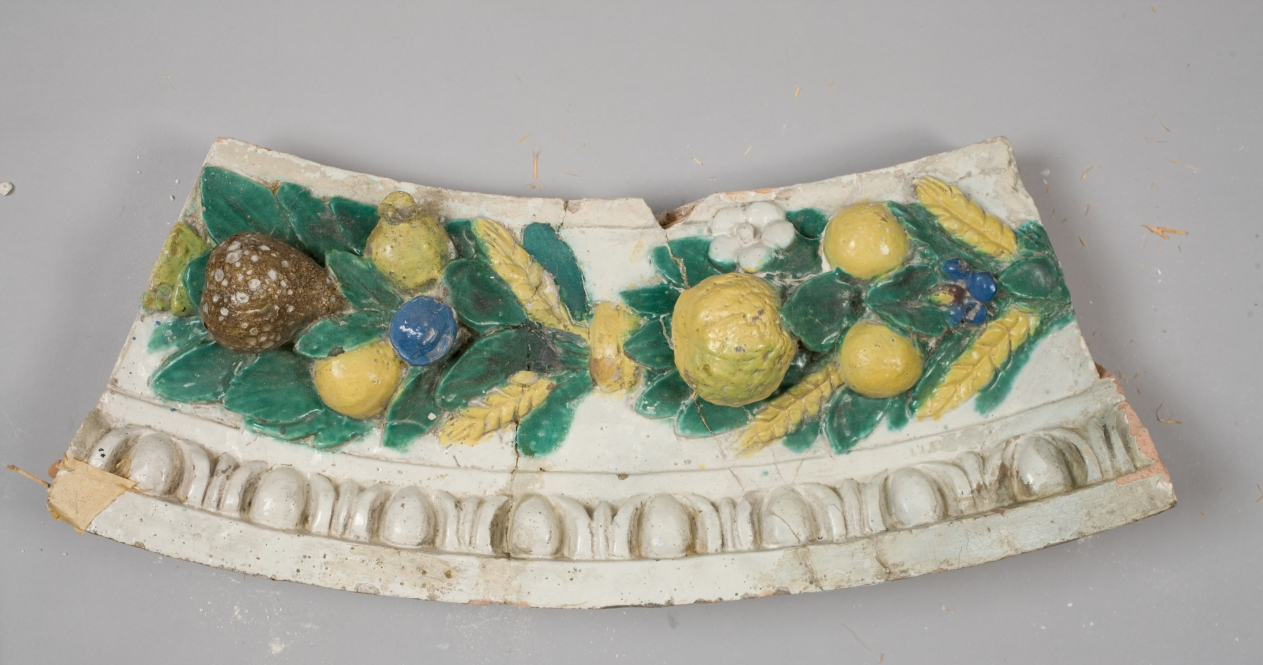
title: Fragment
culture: Italy, Florence, 16th century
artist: Benedetto Buglioni (Italian, 1461–1521)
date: c. 1900–1910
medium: glazed terracotta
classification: Sculpture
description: The Madonna sits upon a throne with the Christ Child standing on her knee. He is steadied by his mother, turning delicately to grasp the Virgin's robe for support. On the left is St. Francis, identified by his stigmata. On the right, St. Anthony Abbot is identified by his monk's robe and T-shaped walking stick. The brown robes of the saints, the purple of the Virgin's tunic (a shade characteristic of the artist), and the flesh tones of the figures contrast strongly against the bright blue background. In the semicircular sky behind the figures, three winged cherub heads emerge, representing a host of angels. The inclusion of St. Francis in this altarpiece honors the saint, suggesting that the altarpiece may have been originally built into the wall of a Franciscan institution in Tuscany. Two shields bearing the Borgherini family crest appear in the lower portion of the altarpiece's border, further suggesting that the chapel for which this altarpiece was made was likely owned or endowed by the family. Glazed terracotta is both durable and decorative and the gleaming white of this piece would have stood out in the darkness of a church. The medium was made popular by Renaissance artist Luca della Robbia and came into fashion as a substitute for expensive carved marble. A rounded arch frame embellished with fruit and flower garlands as well as egg-and-dart and cord moldings accompanied the work when it was acquired, but was later determined not to be original and removed. Buglioni's work bears the influence of the della Robbias, particularly in the simple color scheme. Buglioni likely worked in the studio of Luca's nephew, Andrea, where he would have learned the technique of glazing terracotta.